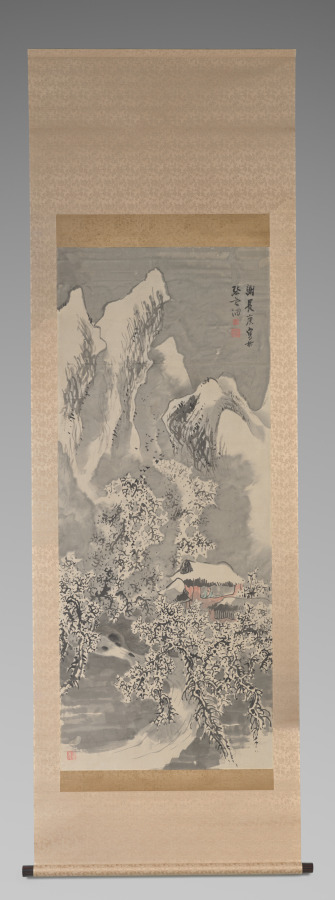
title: Snow Landscape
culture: Japan, Edo period (1615–1868)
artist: Yosa Buson (Japanese, 1716–1783)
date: mid-1770s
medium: hanging scroll; ink and color on paper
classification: Painting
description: In this painting, the mountains and sky glow with a hidden warmth from undertones in red as birds descend into the trees around a scholar’s retreat. Yosa Buson is recognized in Japanese literary history as one of the country’s greatest poets, but he was also an accomplished, self-taught painter. His style changed over the course of his career. Initially painting with precise brushwork, he gradually developed a freer style like the one he used in this snowscape.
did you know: One of the artist's seals reads: "flung ink gives life to brush lines."